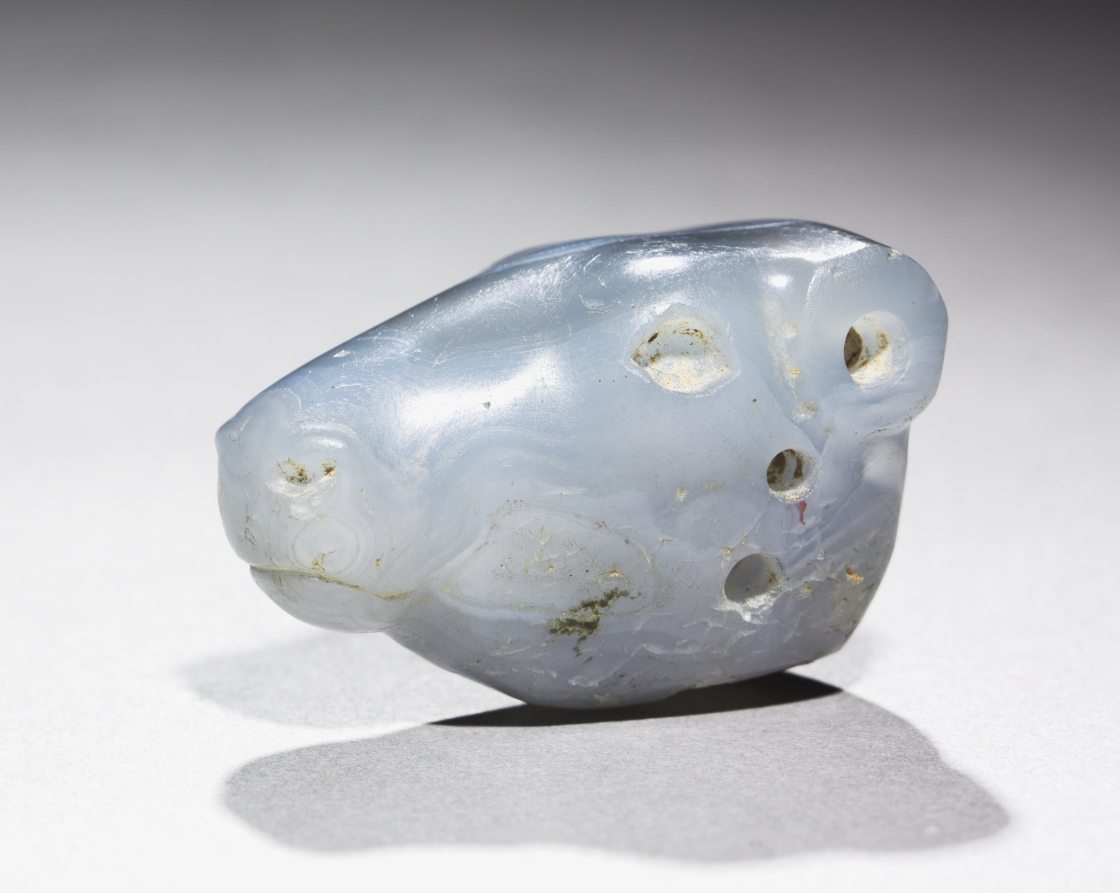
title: Head of a Bull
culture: Mesopotamia, Sumerian, Iraq, Tigris-Euphrates valley, Early Bronze Age I (c. 3300–c. 3000 BCE)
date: 3000–2000 BCE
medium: chalcedony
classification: Sculpture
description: This bull head is carved in a banded stone. The sculptor has ingeniously planned the work so that the veins of the stone enhance the anatomy of the head. Inlays of stone, ivory, or gold (now missing) were set into the eyes and horn sockets. The other holes were used to attach the head to a body of a different material.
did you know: This object is made of quartz, which is used to make electronics today.